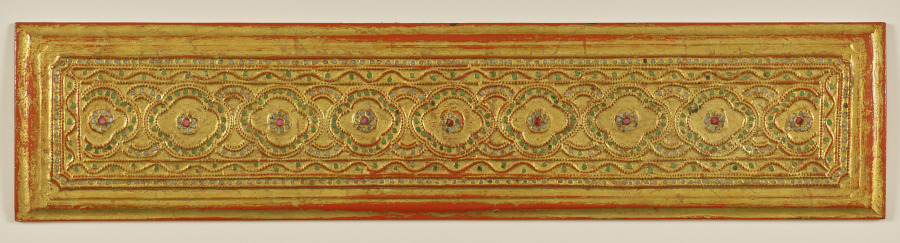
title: Kammavacha: Buddhist Ordination Text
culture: Myanmar (Burma)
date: 1800s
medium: Cover: lacquer, gilding, and glass appliqué on wood; leaves: lacquer and gilding on cloth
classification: Manuscript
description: In premodern Burma, lay people commissioned lavishly ornamented manuscripts for ceremonial occasions, when officiants would read aloud from the text. Written in black lacquer, the text is in the language of Pali written in a Burmese script. It contains ordination rites and procedures for monastic ceremonies. The second to last page is covered with intricately drawn, winged celestial beings (nats) in gestures of praise. They fly amid intertwining vegetation—denoting bounty—that grows from serpentine forms that refer to rain clouds. Lionlike forms inhabit the space with them. The top and bottom covers are equally ornamented with jeweled floral patterning.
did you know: The Pali text of this manuscript is written in Burmese square script, which is also known as "tamarind seed script."